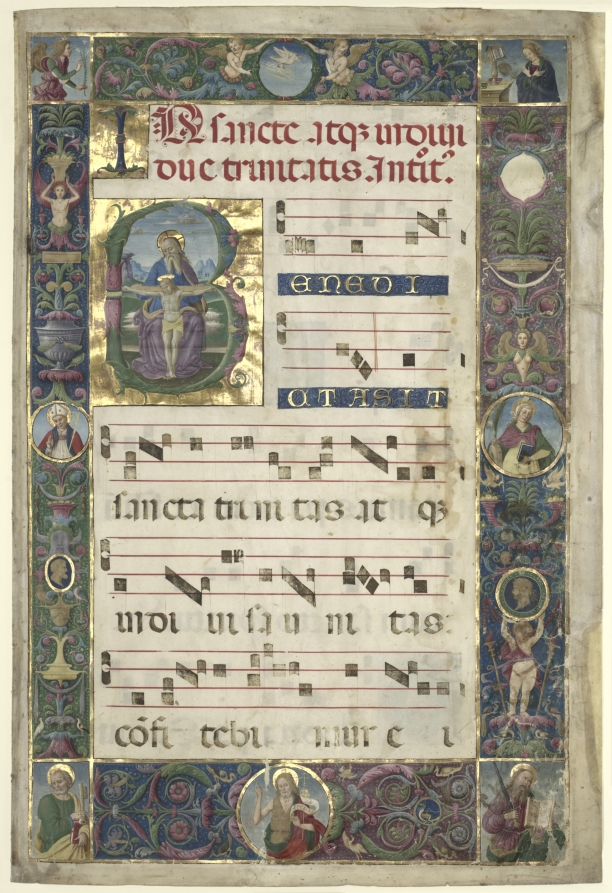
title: The Trinity: Leaf from a Gradual with Initial B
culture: Italy, Perugia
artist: circle of Perugino (Italian, c. 1450/55–1523)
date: c. 1496–1502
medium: ink, tempera, and gold on parchment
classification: Manuscript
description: The focus of this lavishly illuminated page is a large initial B containing a representation of the Holy Trinity (three persons in one godhead). The text, Benedicta sit sancta Trinitas, introduces the opening of the Introit for Mass on Trinity Sunday, celebrated one week after Pentecost. An illusion has been created by the artist who painted the framing initial to appear three-dimensional. Beyond the initial a landscape recedes as if viewed through an open window. The decoration extends into all four margins that are filled with small miniatures depicting saints (one was left blank). This page is a masterful example of Renaissance manuscript painting with classicizing leaf scrolls, masks, urns, putti, and other decorative motifs fashionable in Italy at the close of the 15th century. It may come from a set of choir books illuminated for Perugia Cathedral.